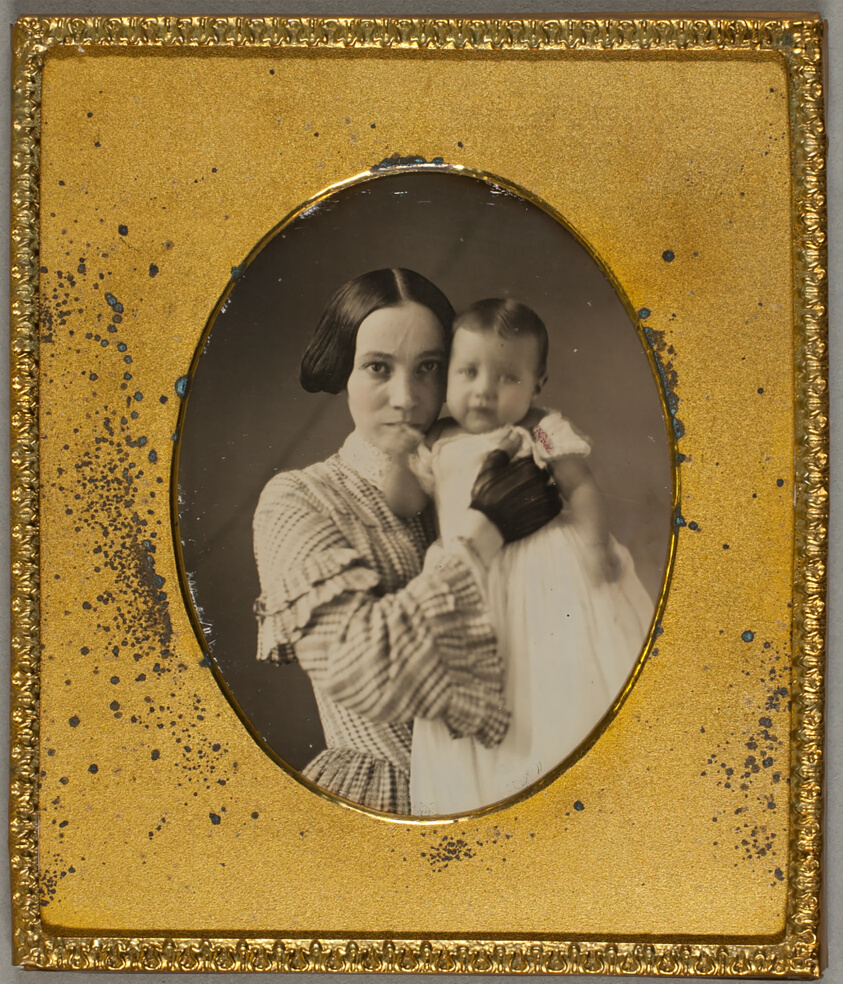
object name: Photograph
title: Untitled (Mother and Child in an Informal Pose)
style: 19th century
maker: Artist unknown; Probably American, 19th century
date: 1839/60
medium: Daguerreotype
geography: United States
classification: photograph; daguerreotype; photography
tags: mothers, children, babies